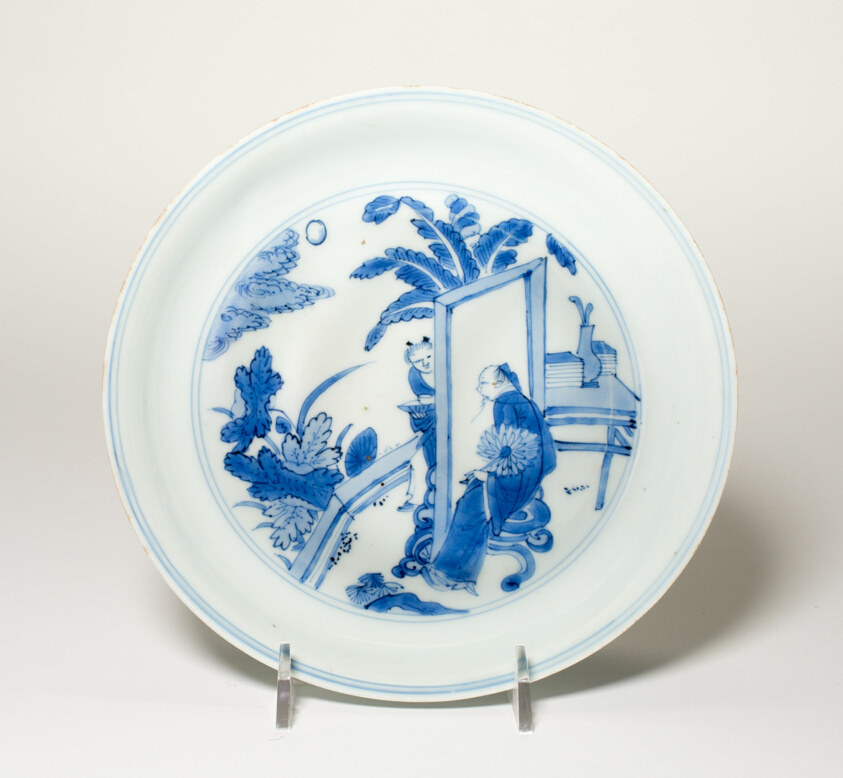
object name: Vessel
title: Plate with Scholar and Attendant in Garden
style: Chinese (culture or style)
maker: China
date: Qing dynasty (1644–1911), Kangxi period (1662–1722)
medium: Porcelain painted in underglaze blue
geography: China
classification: plate (general, dish); porcelain; dish (vessel); asian art; ceramics; vessel